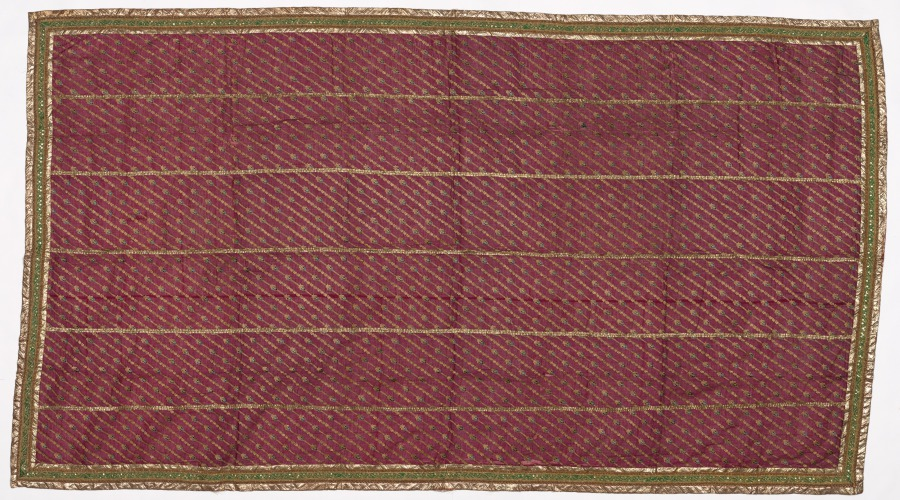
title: Sari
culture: India, 19th - early 20th century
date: 1800s - early 1900s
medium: tabby ground, brocaded and embroidered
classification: Textile